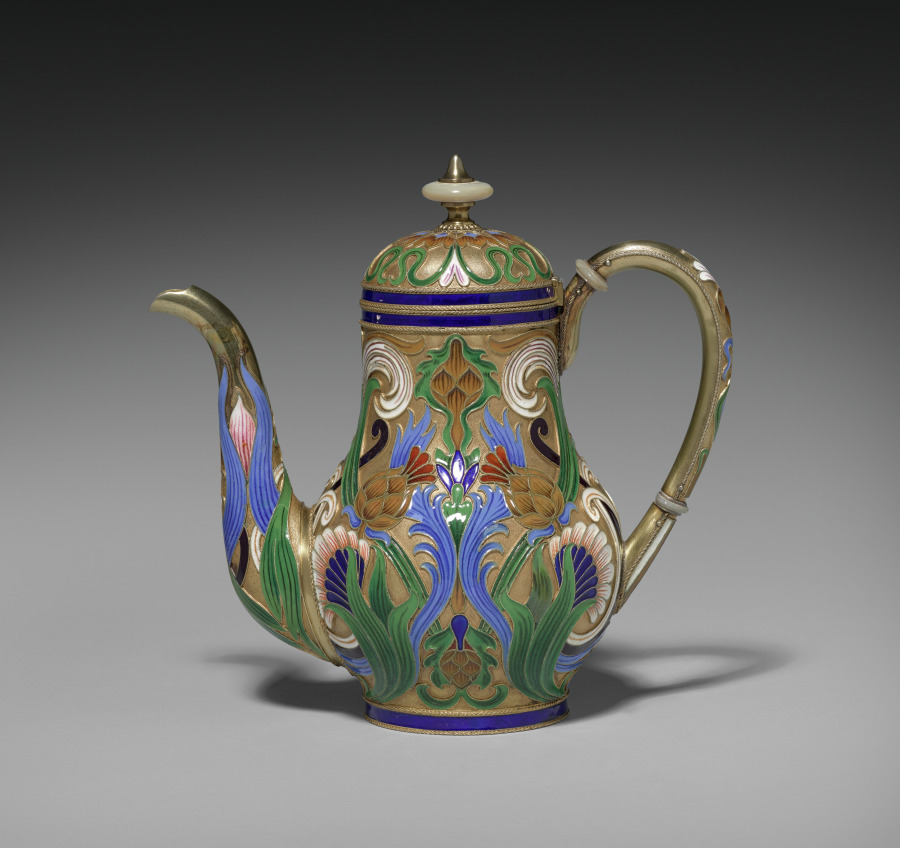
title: Covered Hot Water Pot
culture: Russia, St. Petersburg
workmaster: attributed to Feodor Ivanovich Rückert (Russian, 1840–1917)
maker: House of Fabergé (Russian, 1842–1918)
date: 1887–96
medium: silver gilt, opaque cloisonné enamel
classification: Miscellaneous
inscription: 88, St. George [assay mark for Moscow, 1882-1896]; C. Fabergé (in Cyrillic); double-headed eagle [imperial warrant]; 88; initials of Carl Fabergé (in Cyrillic).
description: Fabergé’s craftsmen in Moscow, especially under the watchful eye of workmaster Feodor Rückert, became known for their work in the pan-Slavic or neo-Russian style, hearkening back to 17th-century motifs of Russian folk art. Often on rather conventional shapes, Rückert and his silversmiths created an explosion of color, achieved through the historic technique of cloisonné enamel in which tiny metal lines are soldered to the surface then filled with glass powders in various colors and fired to create a high gloss finish. The result is a spectacular evocation of the 17th-century originals. Far from mere copies, however, Rückert's designs, such as this tea service, employ naturalistic or abstract motifs in a thoroughly modern adaptation of a remarkable earlier period of Russian art and decoration.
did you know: This covered hot water pot is part of a larger tea set.